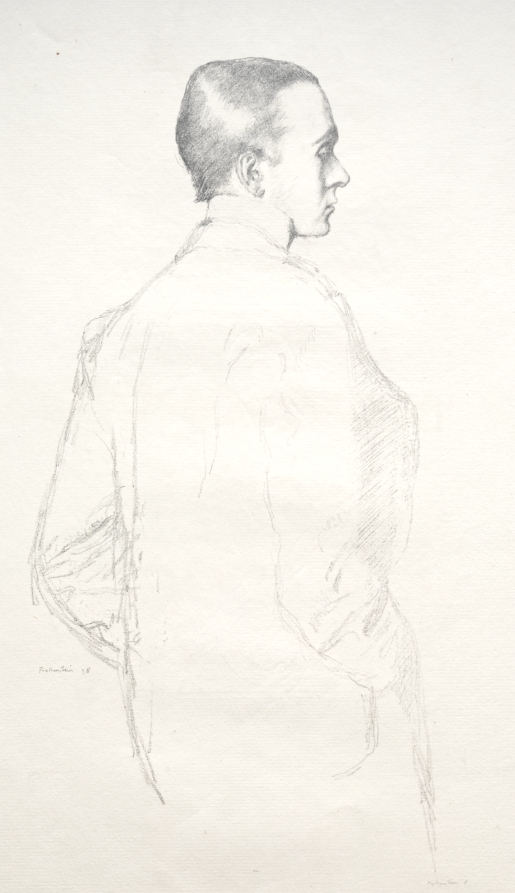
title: Max Beerbohm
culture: England, late 19th Century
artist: William Rothenstein (British, 1872–1945)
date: 1898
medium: lithograph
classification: Print